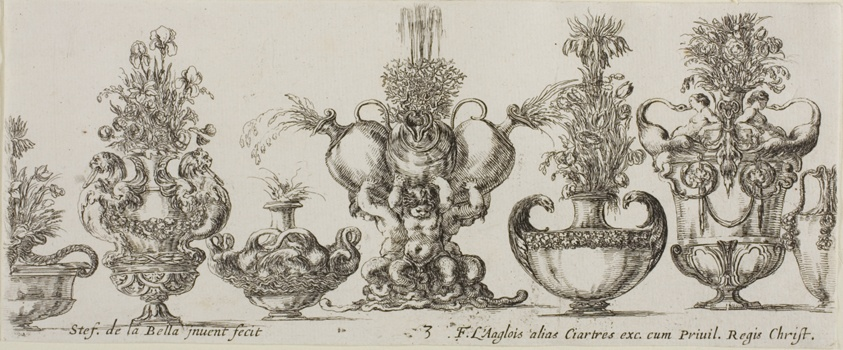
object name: Print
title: Plate Three from Collection of Various Vases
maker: Stefano della Bella (Italian, 1610-1664)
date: before 1648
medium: Etching on ivory laid paper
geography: Italy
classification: etching; paper; print; prints and drawing